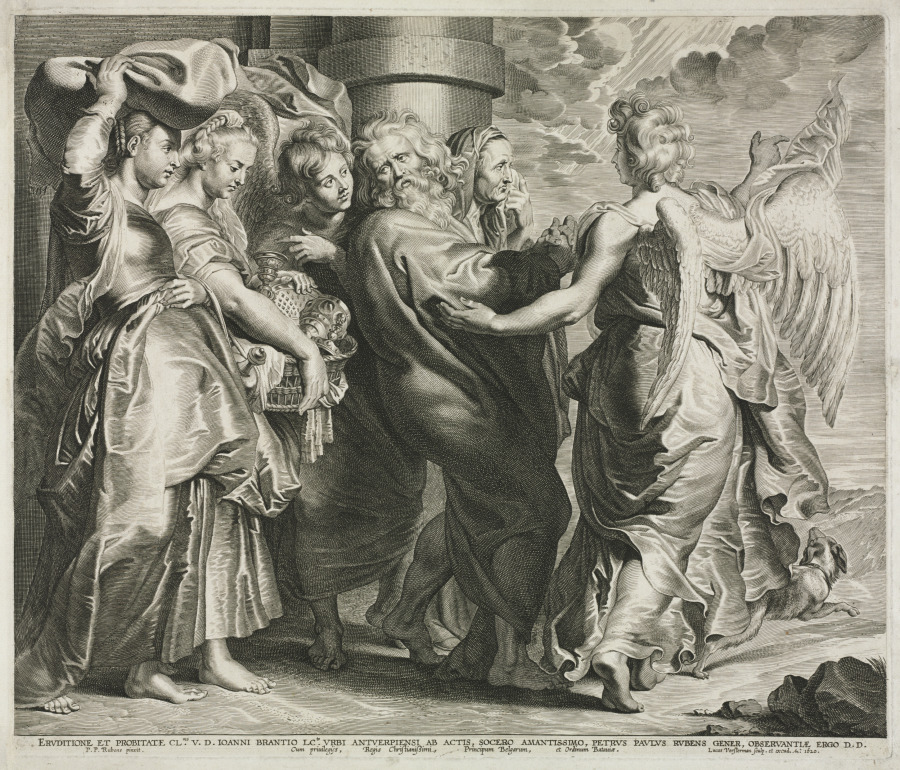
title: Lot and His Family Leaving Sodom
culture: Flanders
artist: Lucas Emil Vorsterman (Flemish, 1595–1675)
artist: after Peter Paul Rubens (Flemish, 1577–1640)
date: 1620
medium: engraving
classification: Print